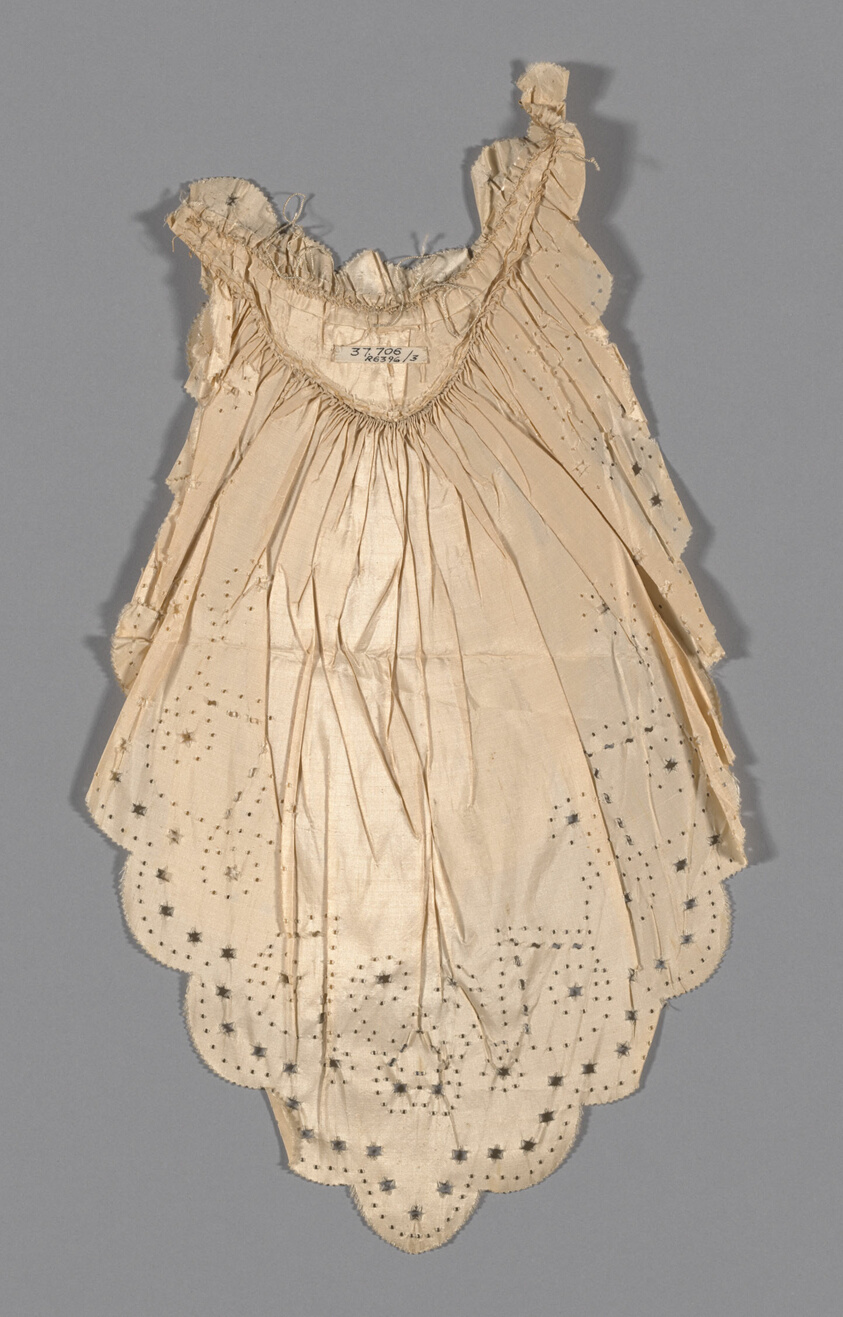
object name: Textile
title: Sleeve Pieces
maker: France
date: 1758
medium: White taffeta with cut work pattern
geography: France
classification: textile; weaving